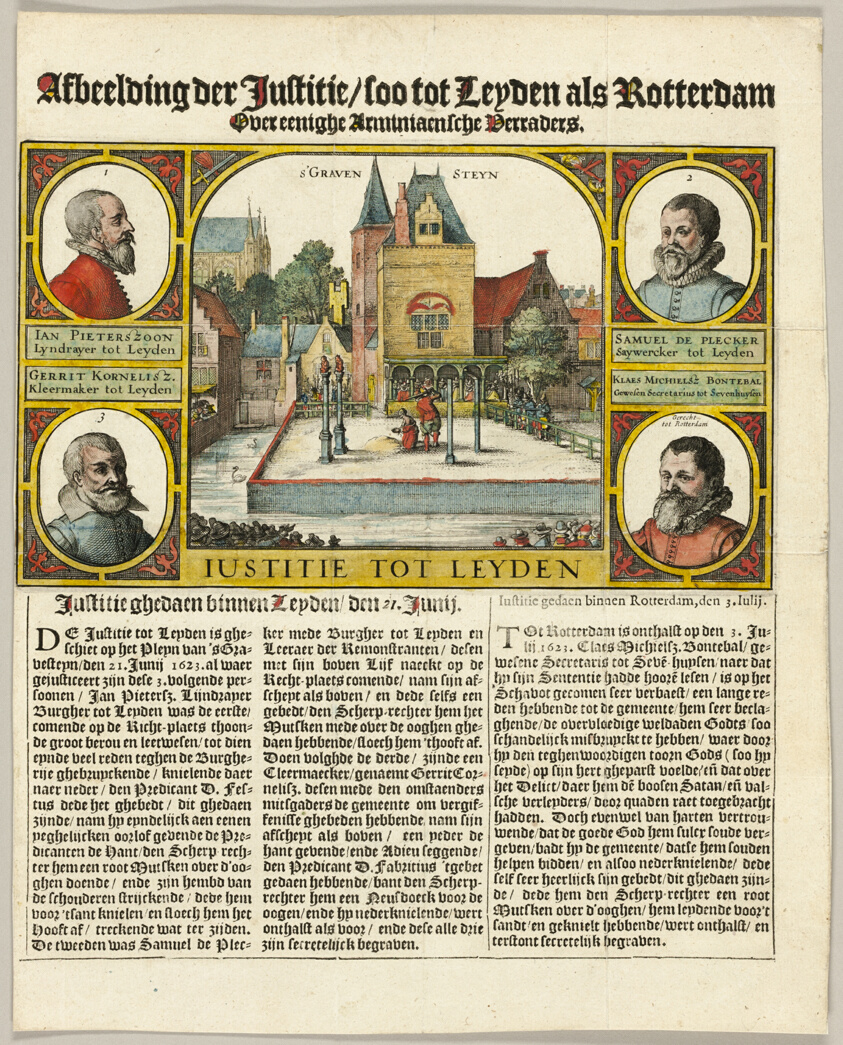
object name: Print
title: Execution of Arminians in Leiden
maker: Claes Jansz. Visscher; Dutch, 1587–1652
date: 1623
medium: Hand-colored etching with engraving and letterpress in black on cream laid paper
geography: Netherlands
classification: print; prints and drawing